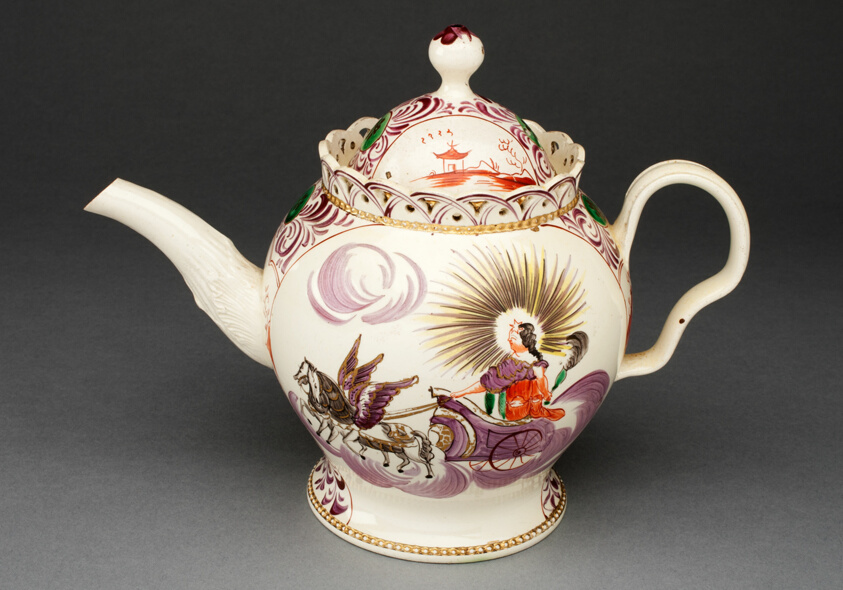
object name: Ceramics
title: Teapot Depicting Aurora in a Chariot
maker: Leeds, England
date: c. 1780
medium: Lead-glazed earthenware (creamware) and polychrome enamels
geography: Leeds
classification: teapot; earthenware; lead-glazed earthenware; creamware; ceramics; european decorative arts